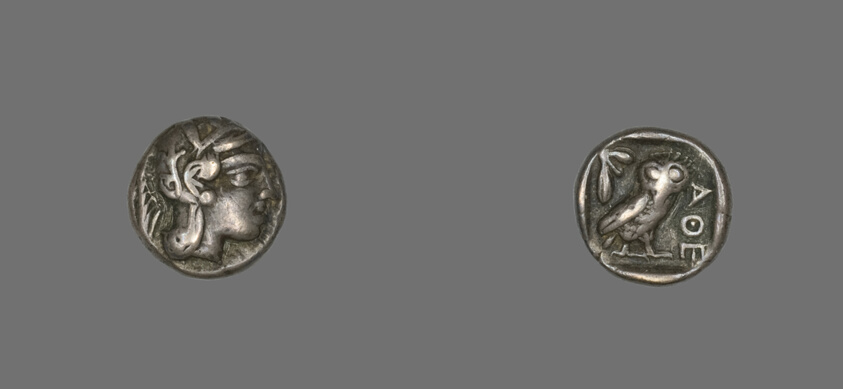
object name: Coin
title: Drachm (Coin) Depicting the Goddess Athena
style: archaic (greek), ancient, greek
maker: Greek, minted in Athens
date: about 490 BCE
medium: Silver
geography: Athens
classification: coin; ancient art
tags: owl, goddesses